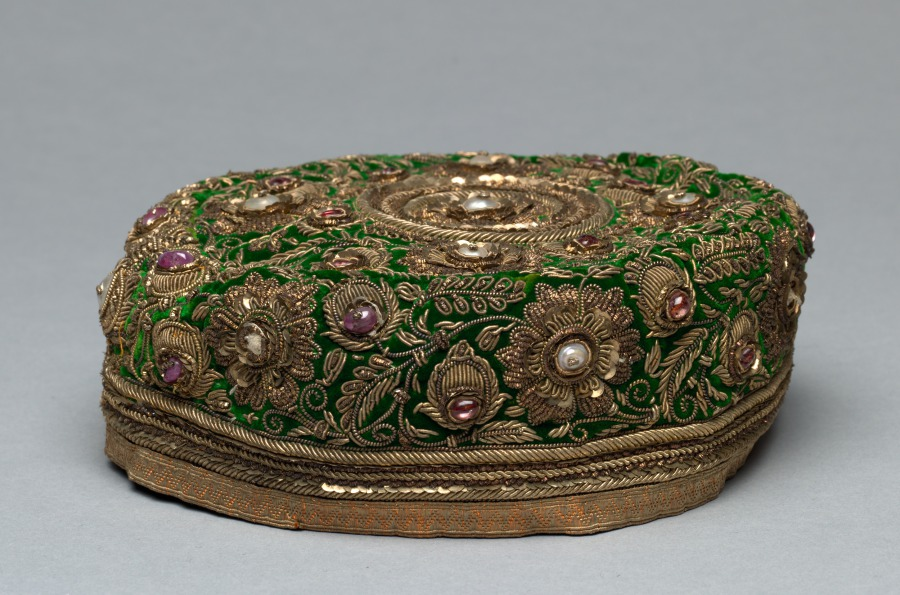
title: Cap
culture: India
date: 1800s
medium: Velvet embroidered with gilt-silver–wrapped silk thread (zari); silk: lining; rubies, pearls, and spinels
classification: Garment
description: Historically in India, head coverings were worn in outdoor and formal contexts and can signal age, allegiance, and status among Indian men and boys. A low round cap such as this was worn primarily by the well-educated aristocratic boys in the king’s circle. The painstaking process of creating the ornament involved wrapping gilt-silver wire of various dimensions around a silk thread core to create a textured appearance for the flowers and vines.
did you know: The semiprecious rose-colored spinels were considered a talisman for military victory.